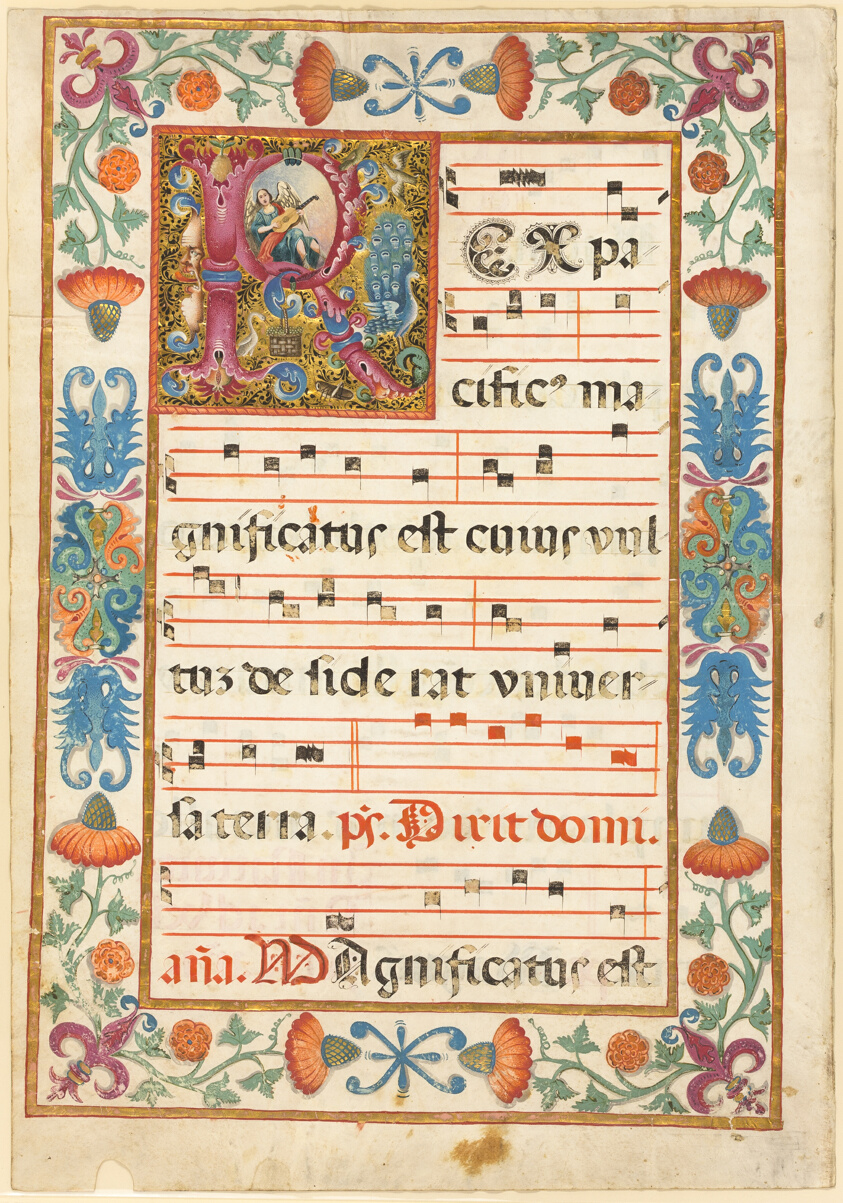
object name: Drawing and Watercolor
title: Angel Playing an Instrument in a Decorated Initial "R" with Flora, Fauna and Grotesque, from an Antiphonal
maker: European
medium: Manuscript cutting in tempera and gold leaf, with Latin inscriptions in black and red ink, ruled in light brown, and with a separate cutting in tempera cut-and-tipped into the decorated letter, on parchment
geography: Europe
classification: tempera; drawings (visual works); prints and drawing